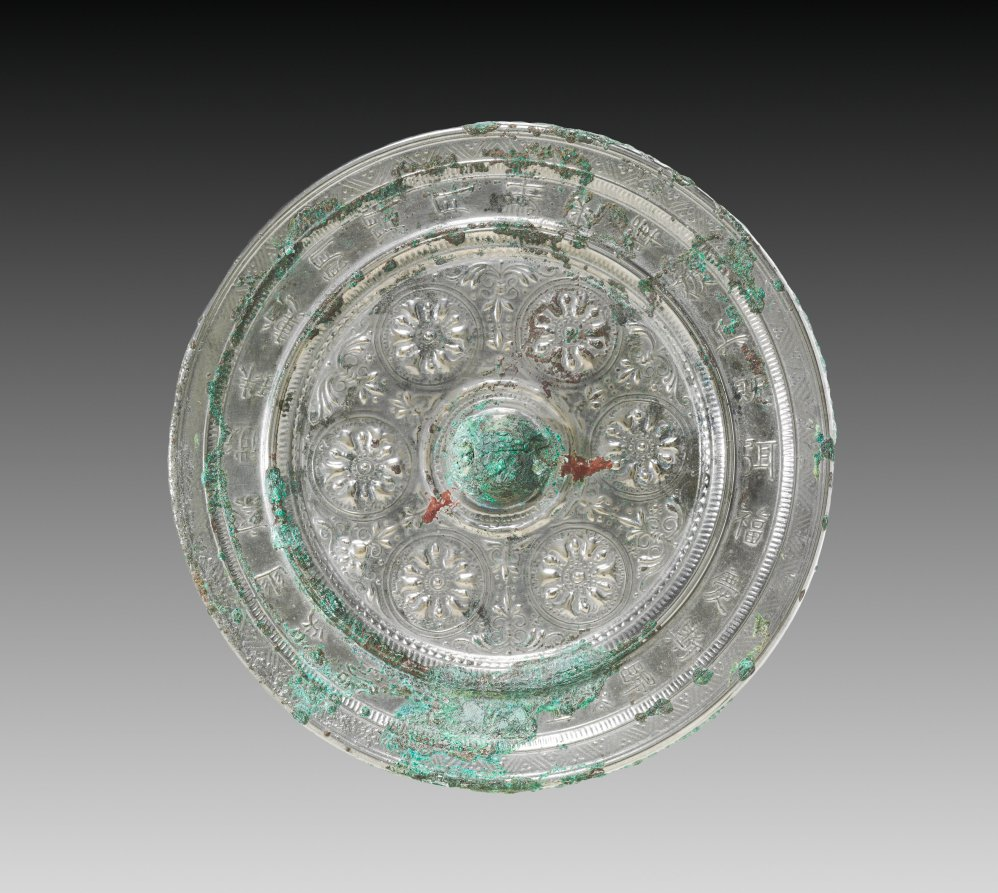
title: Mirror with Six Circular Flowers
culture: China, Tang dynasty (618-907)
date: 600s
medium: bronze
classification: Metalwork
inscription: 【】【】【】膽，知幽察微。珠慚朗潤， 月謝光輝。【】兵既弭，福慶斯歸。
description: Around the mirror’s central knob, there are six floral designs set within circles, separated by candelabra-like dividers. These flower designs later became known as "baoxiang hua 寶相花" or "flowers of precious appearance", which often remind people of Buddhist connections. The design also includes a ribbon of inscription, praising the mirror’s clarity and celebrating the end of a war.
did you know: This mirror was made to commemorate the end of a war.